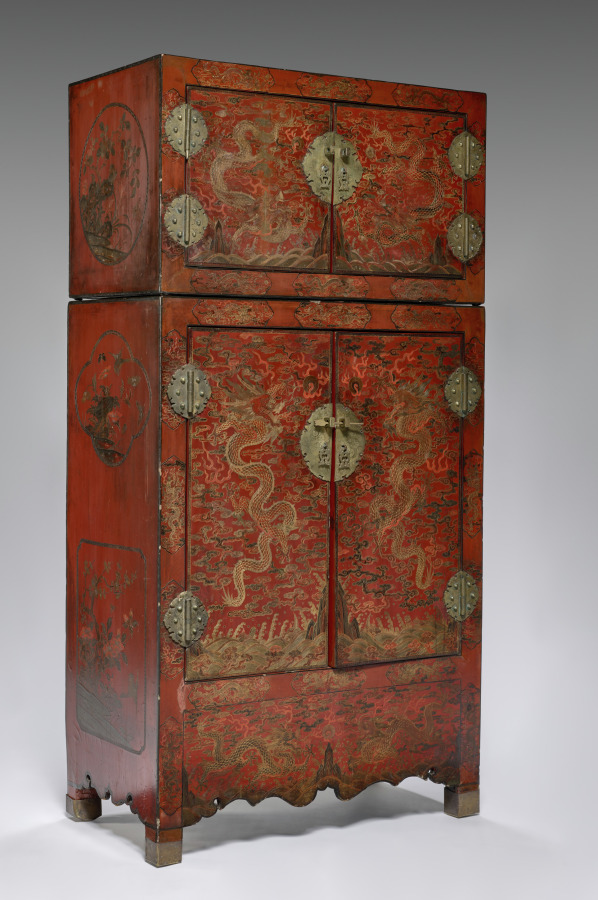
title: Double Cabinet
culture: China, Ming dynasty (1368-1644) - Qing dynasty (1644-1911)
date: 1600s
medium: red lacquer on wood with pigment and gilding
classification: Furniture and woodwork